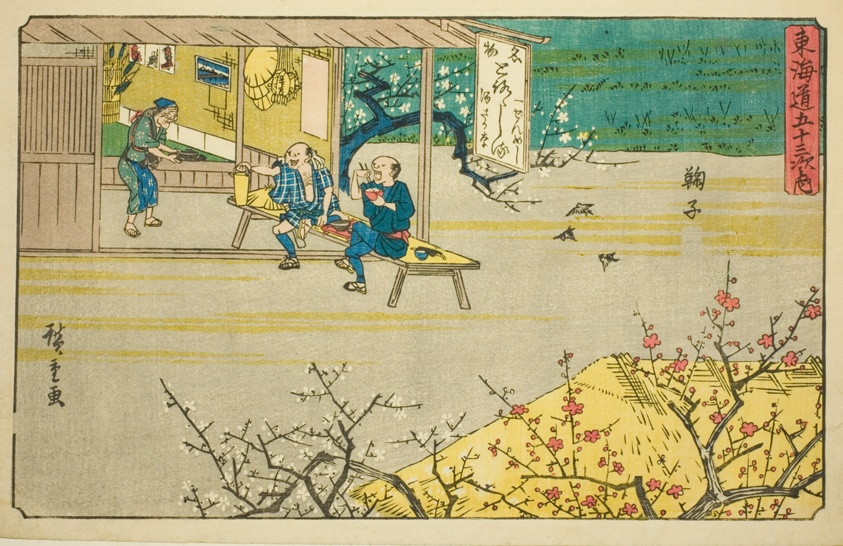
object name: Print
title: Mariko, from the series "Fifty-three Stations of the Tokaido (Tokaido gojusan tsugi no uchi)," also known as the Gyosho Tokaido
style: Japanese (culture or style)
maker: Utagawa Hiroshige 歌川 広重; Japanese, 1797-1858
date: c. 1841/44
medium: Color woodblock print; aiban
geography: Japan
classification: woodblock print; print; asian art